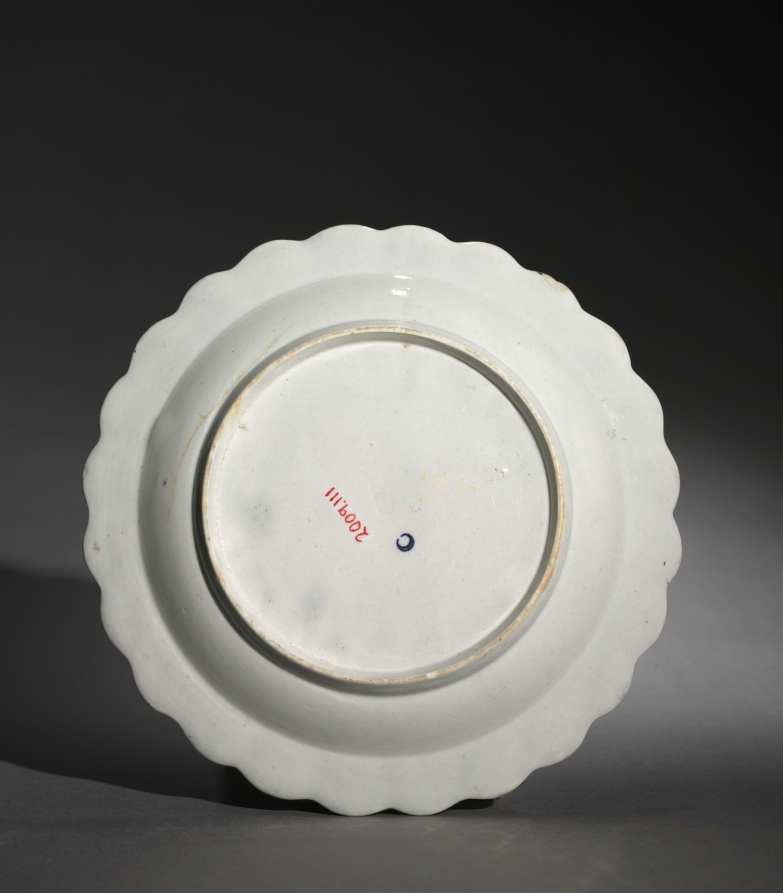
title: Plate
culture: England, Worcester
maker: Worcester Porcelain Factory (British, established 1751)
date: c. 1750–70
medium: porcelain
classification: Ceramic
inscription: half moon mark on the bottom.